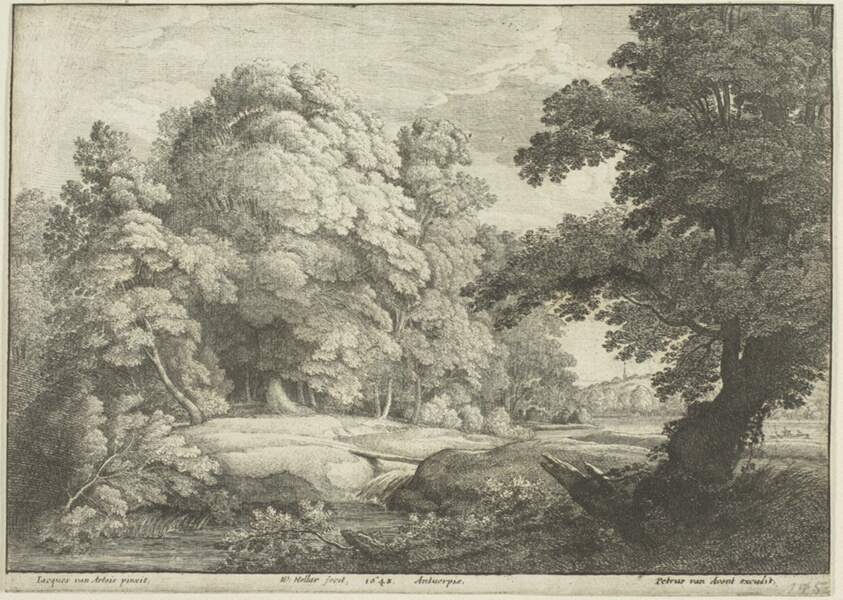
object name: Print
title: The Bridge Over the Waterfall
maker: Wenceslaus Hollar (Bohemian, 1607-1677); after Jacobus van Arthois (Flemish, 1613-after 1686); published and/or engraved by Petrus van Avont (Flemish, active 17th century)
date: 1648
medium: Etching on ivory laid paper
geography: Bohemia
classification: etching; print; prints and drawing